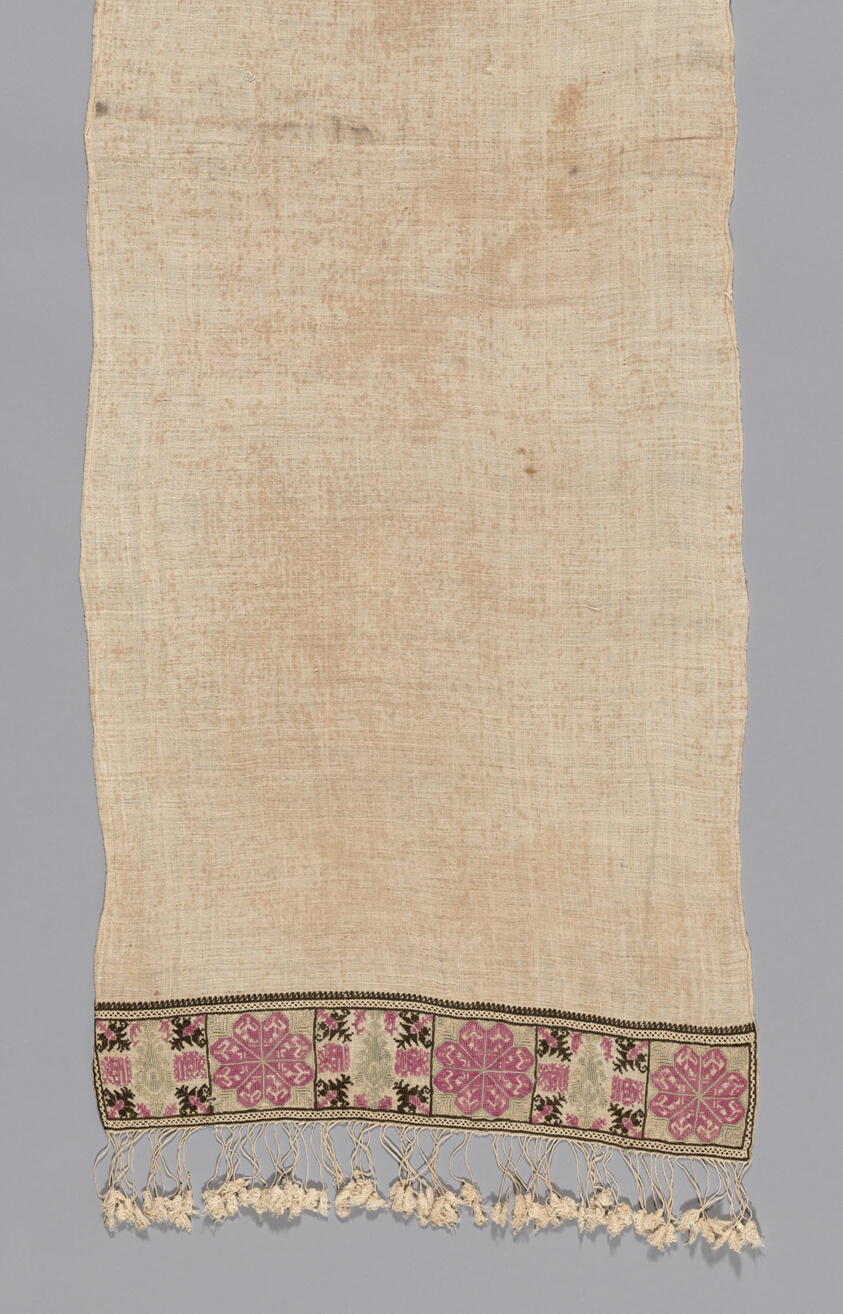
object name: Costume and Accessories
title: Scarf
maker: Greece, Northern Sporades Islands, Lesbos, Mytilene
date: 1700/1900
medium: Linen, plain weave; pulled thread word embroidered with silk in darning and hem stitches; embroidered in double running ans whipped stem stitches; plied warp fringe with linen knotted tassels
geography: Lésvos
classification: textile; needlework (visual works); costume